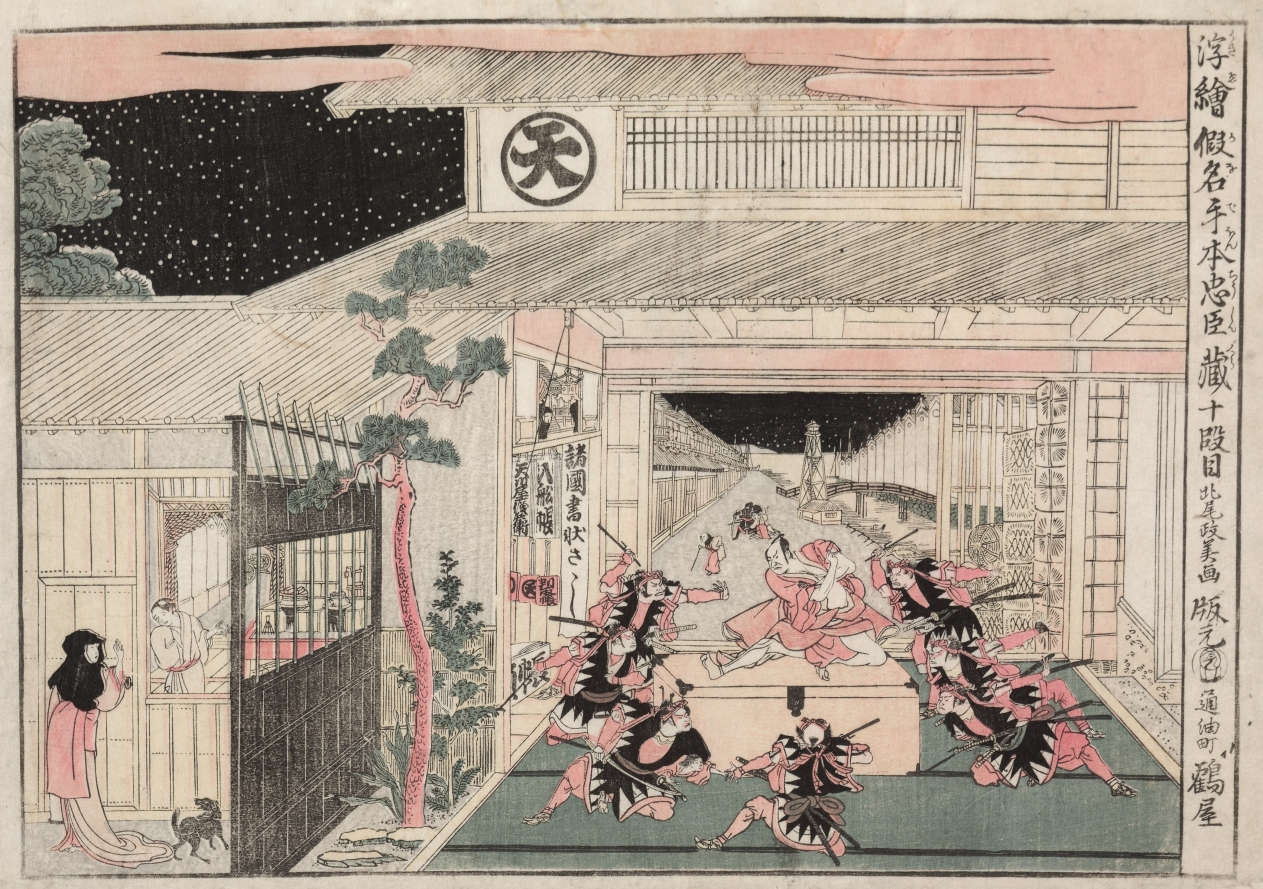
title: Chushingura: Act X (from the series Perspective Pictures for The Treasure House of Loyalty)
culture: Japan, Edo period (1615–1868)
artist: Kitao Masayoshi (Japanese, 1761–1824)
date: c. 1790s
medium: color woodblock print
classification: Print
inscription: Signature: Kitao Masayoshi ga Publisher: Tsuruya Kiemon (hammoto Toriaburacho Tsuruya, emblem) Censorship Seal: kiwame